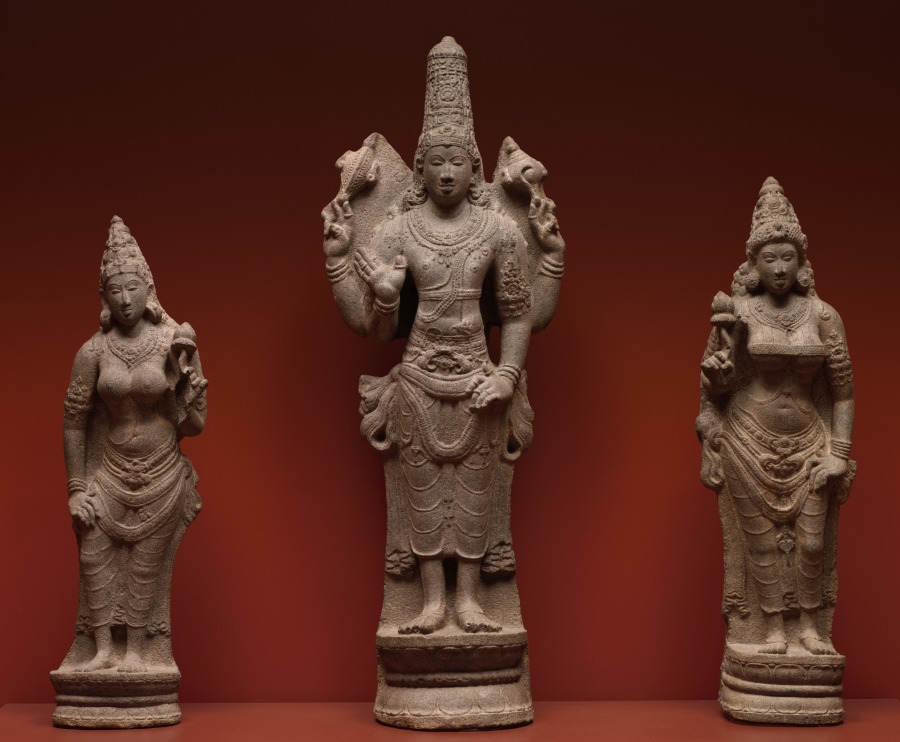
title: Vishnu with Shri and Bhu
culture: South India, Tamil Nadu, probably Pudokkatai, early Chola Dynasty, 10th Century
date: 900–950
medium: granite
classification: Sculpture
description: Vishnu is shown here in his form as supreme lord, his high crown indicative of his royal aspect; his four arms reveal his superhuman nature. His upper right hand holds a discus, seen from the side. In his upper left hand he holds the conch shell. Vishnu's wives, Shri, the goddess of abundance and good fortune, and Bhu, the earth goddess, hold lotus flowers.